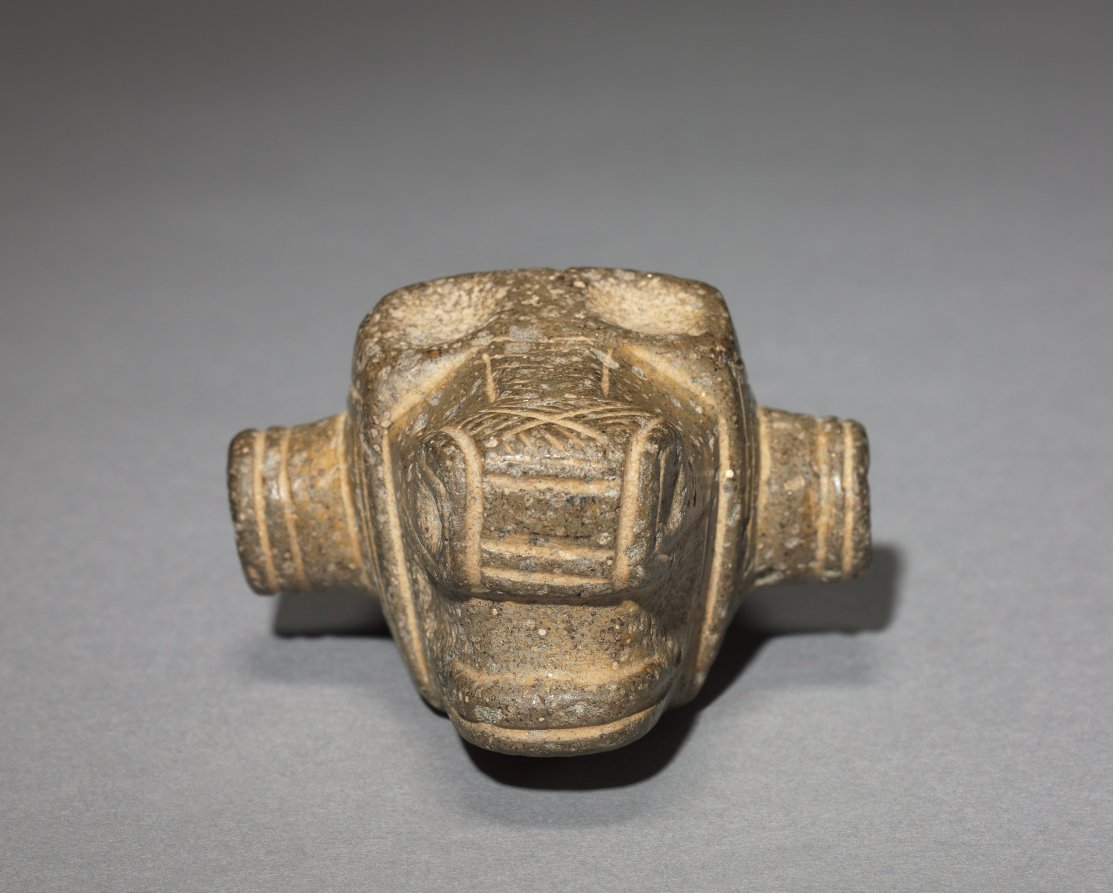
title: Mace Head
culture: Costa Rica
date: 300–500 CE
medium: pecked and polished gray stone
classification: Sculpture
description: Once mounted on wooden shafts, elaborately shaped mace (club) heads like this one probably were not used as weapons. Rather, they could have served as emblems of chiefly authority, group insignia, the heads of ceremonial weapons, or all three. They eventually were placed in elite graves. The back-curled nose on this example may refer to a crocodile or caiman.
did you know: In ancient Costa Rica, it was believed that the world rested on the back of a crocodile.